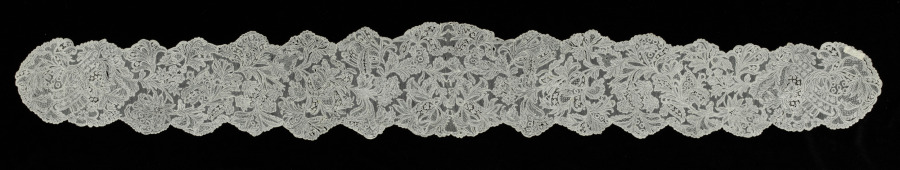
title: Lace Lappet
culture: Italy, Venice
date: 1700–1740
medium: Needle lace (Grounded Venetian Point)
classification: Lace